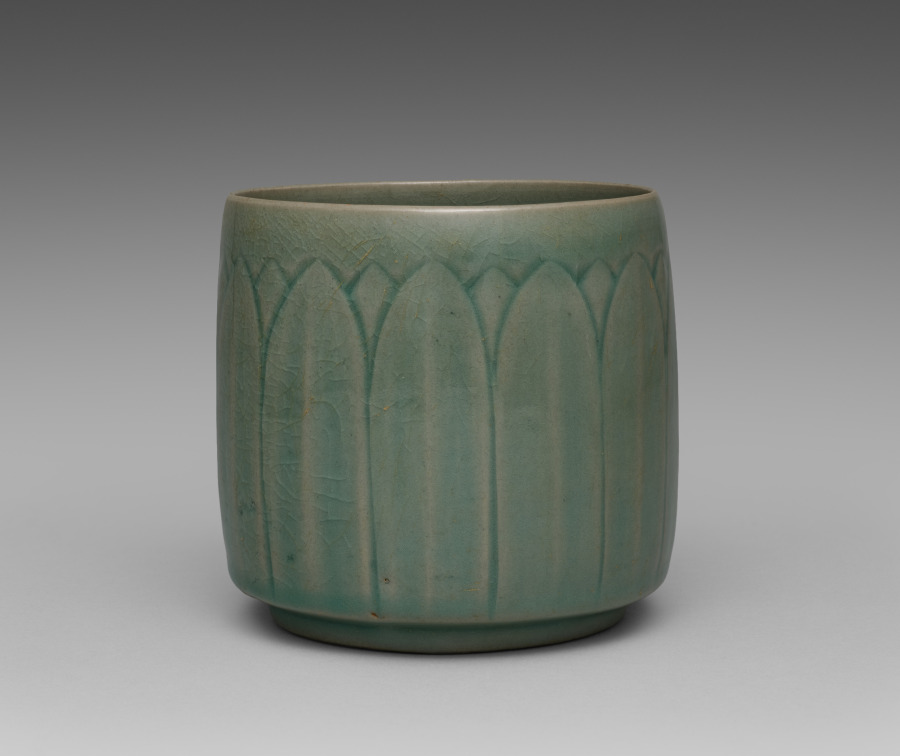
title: Celadon Cup with Molded Lotus Petal Design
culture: Korea, Goryeo dynasty (918–1392)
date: 1100s–1200s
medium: Celadon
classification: Ceramic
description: Celadon wares intended for everyday use—such as this dish—were among the most common burial objects placed in tombs during the Goryeo period (918–1392). Furnishing tombs with elaborate assemblages of objects was believed to honor the deceased and provide comfort in the afterlife. This dish, featuring the lotus petal motif, was likely a cherished possession that accompanied its owner to their final resting place.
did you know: The outer wall of this teacup is decorated with the image of lotus flower petal, a symbol of purity and salvation.